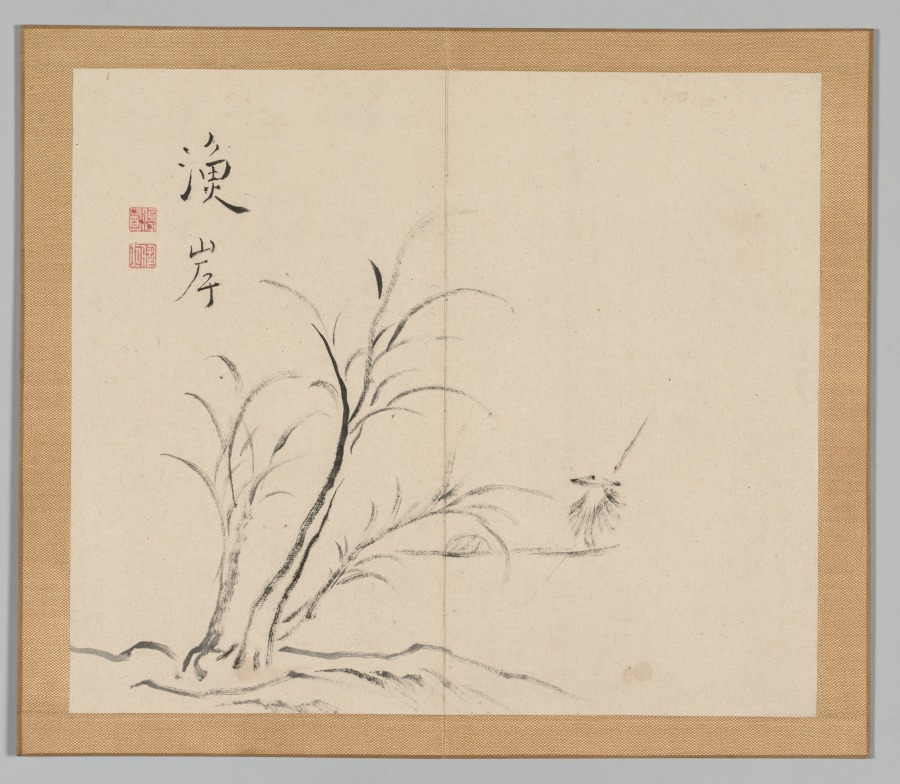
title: Reverberations of Taiga, Volume 2 (leaf 26)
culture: Japan, Edo period (1615–1868)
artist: Aoki Shukuya (Japanese, d. 1802)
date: mid- to late 1700s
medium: double-leaf from a pair of albums; ink and light color on paper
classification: Portfolio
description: Traditionally, young painters in Japan began their studies with an established master-painter. The master's compositions invariably became models that the apprentice copied to learn various ink and brush techniques. Shukuya was a pupil of the famous Kyoto artist Ikeno Taiga, whose style is reflected in these sketches of rocks, trees, and mountains.